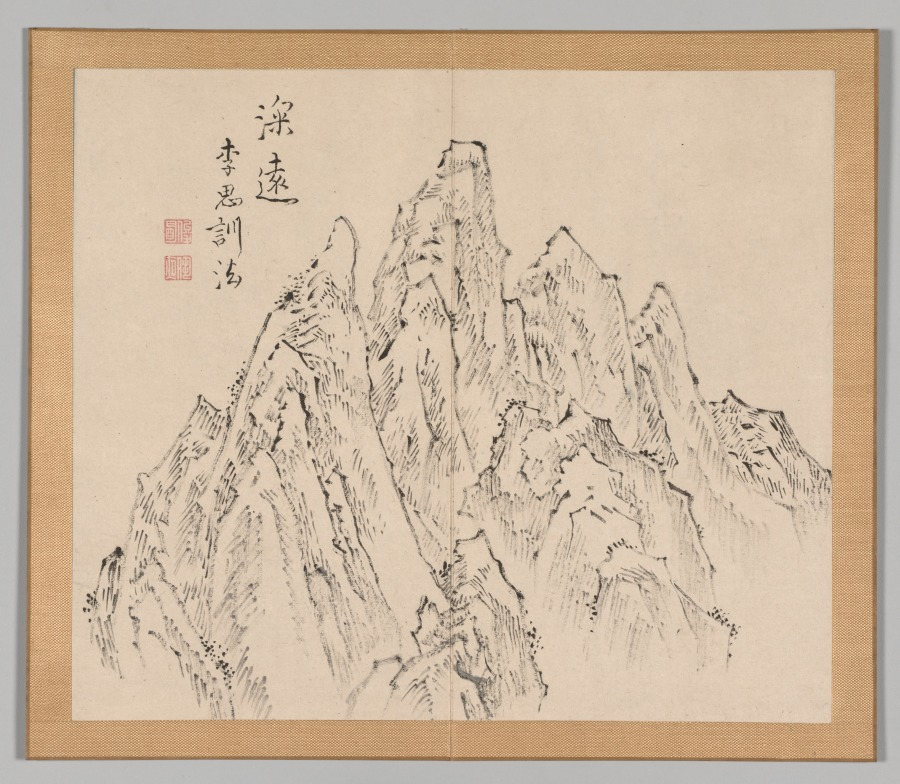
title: Reverberations of Taiga, Volume 2 (leaf 6)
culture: Japan, Edo period (1615–1868)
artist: Aoki Shukuya (Japanese, d. 1802)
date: mid- to late 1700s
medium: double-leaf from a pair of albums; ink and light color on paper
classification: Portfolio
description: Traditionally, young painters in Japan began their studies with an established master-painter. The master's compositions invariably became models that the apprentice copied to learn various ink and brush techniques. Shukuya was a pupil of the famous Kyoto artist Ikeno Taiga, whose style is reflected in these sketches of rocks, trees, and mountains.